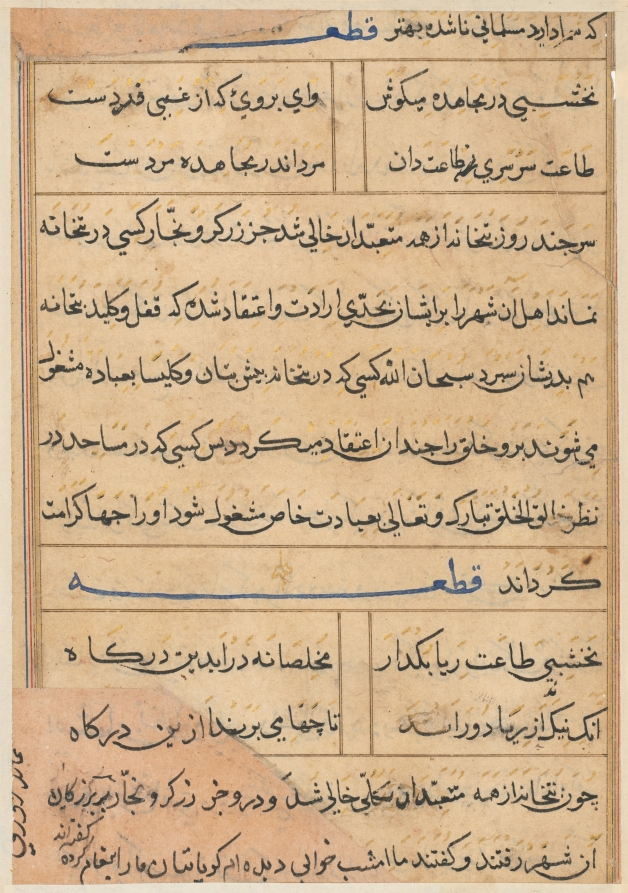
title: Page from Tales of a Parrot (Tuti-nama): text page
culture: Mughal India, court of Akbar (reigned 1556–1605)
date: c. 1560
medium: gum tempera, ink, and gold on paper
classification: Painting